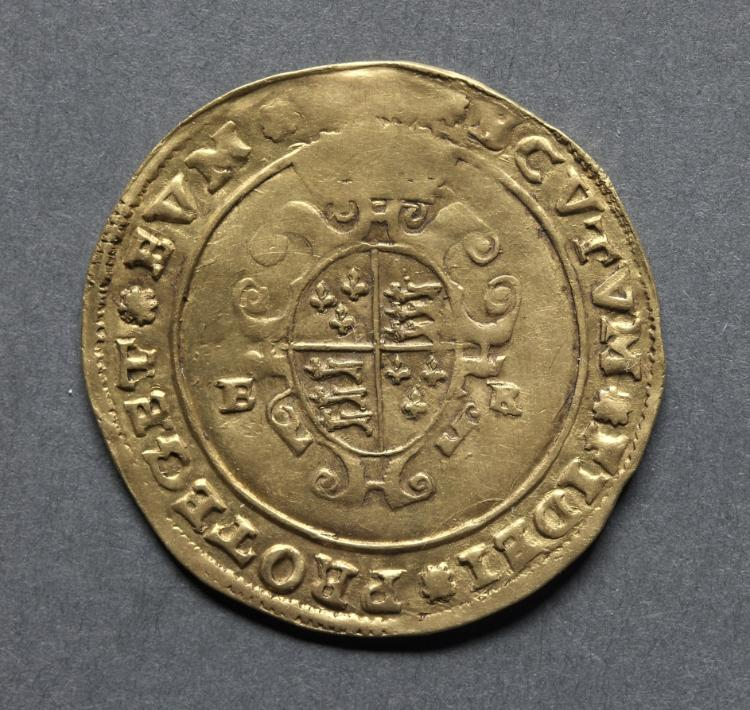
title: Half Sovereign: Crowned Royal Arms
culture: England, Edward VI, 1547-1553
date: 1549–1550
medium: gold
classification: Coins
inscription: SCUTUM DIFEI PROTEGET EUM